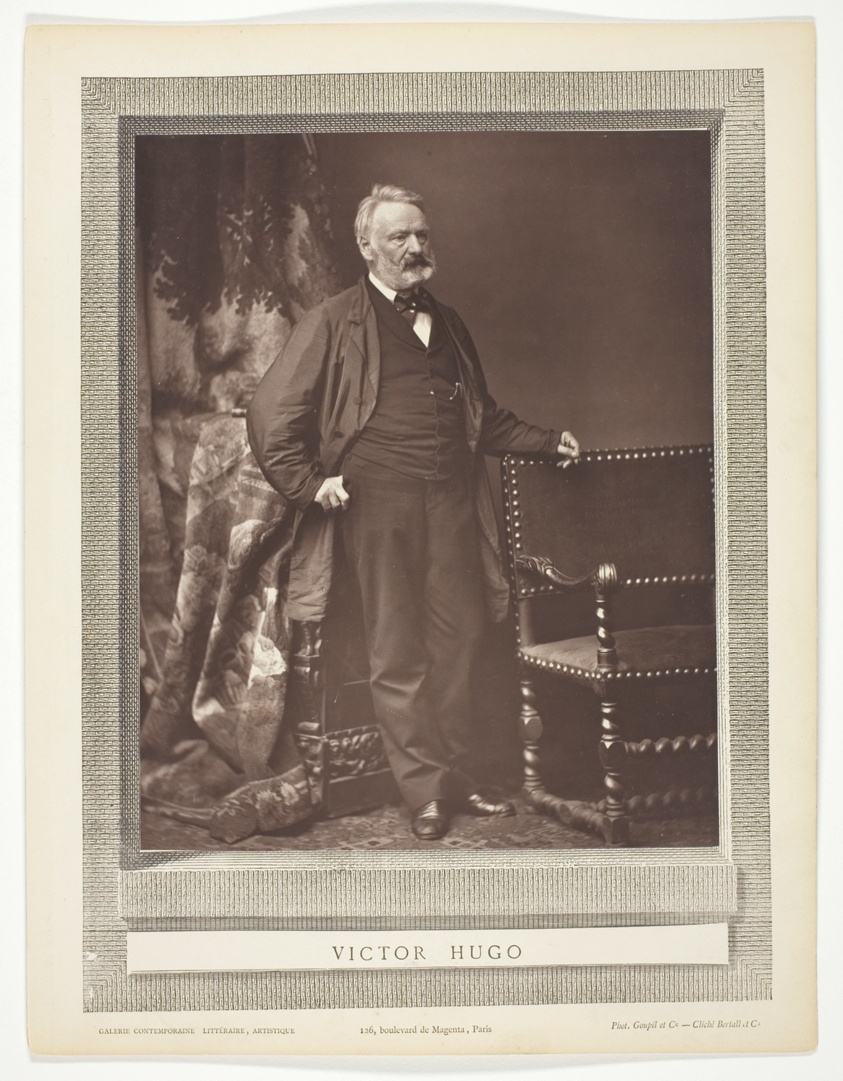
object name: Photograph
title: Victor Hugo (French novelist, playwright, and poet, 1802-1885)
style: 19th century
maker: Bertall et Cie; probably French, 19th century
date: 1875/76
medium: Woodburytype, from the periodical “Galerie Contemporaine Littéraire, Artistique” (1876), volume 1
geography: France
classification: woodburytype; photomechanical process; photography; photograph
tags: Collected by Hugh Edwards, Contemporaine Littéraire